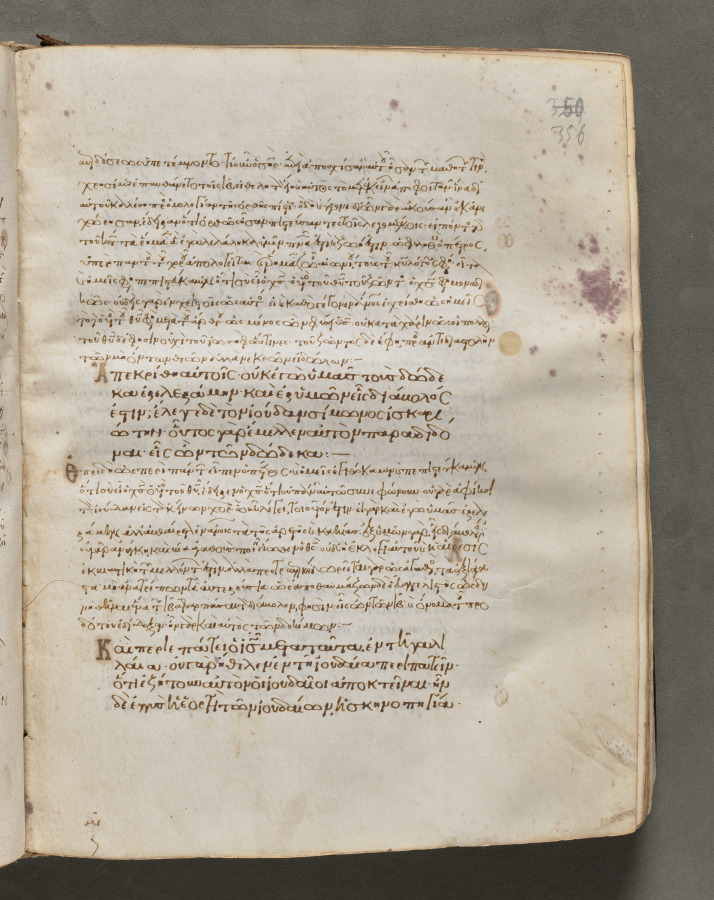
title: Text, folio 356 (recto), from a Gospel Book with Commentaries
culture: Byzantium, Constantinople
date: c. 1000–1100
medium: ink, tempera, and gold on vellum; leather binding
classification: Bound Volume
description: Each of the four gospels in this book opens on a page with brilliantly illuminated borders depicting the author of the text as well as birds—principally peacocks, symbols of the immortality of the soul—and fountains, representing the fountain of life and the salvation of the soul. This volume consists of 428 leaves with texts in Greek. Its level of sophistication suggests that it was probably written and decorated in a monastery in Constantinople.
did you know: Gospel books were carried in procession through Byzantine churches.